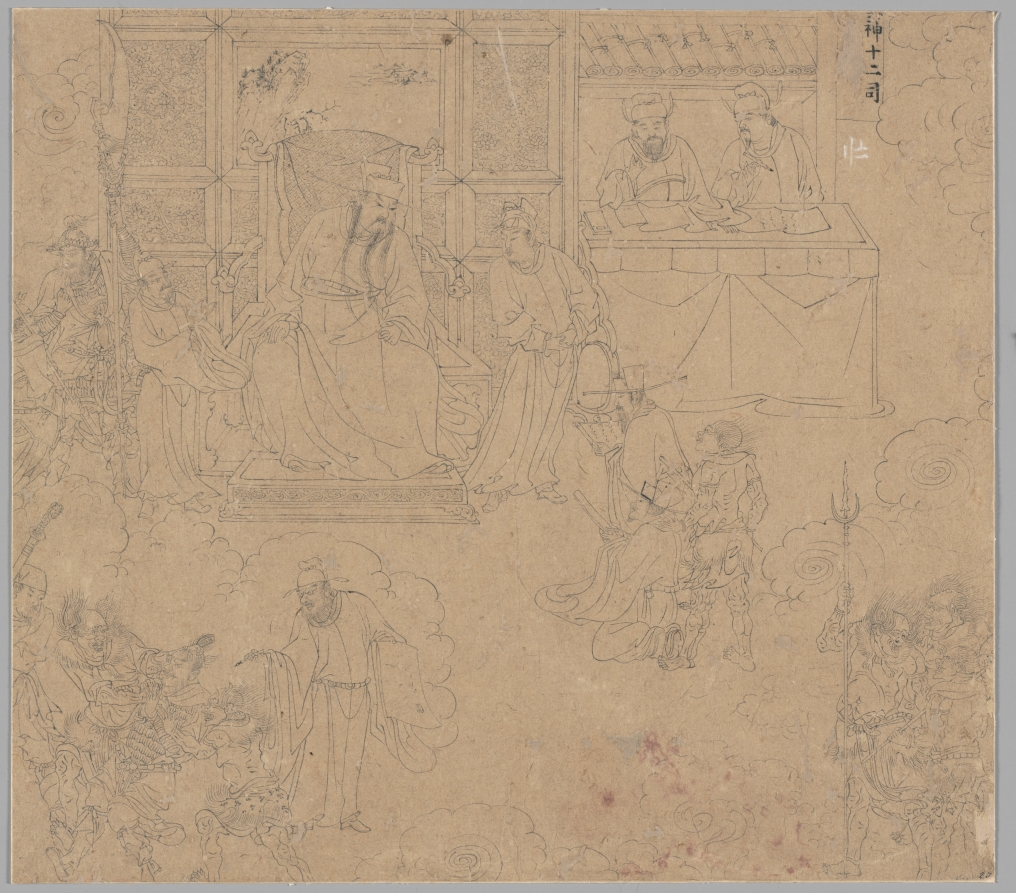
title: Album of Daoist and Buddhist Themes: Kings of Hells: Leaf 27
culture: China, Southern Song dynasty (1127-1279)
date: 1200s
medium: Album, ink on paper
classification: Painting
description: This leaf is part of a set depicting the Ten Kings of Hell. The theme transforms the Indian Buddhist view of judgment after death into a typical Chinese bureaucratic process. Before being permitted to transmigrate into the next life, a soul is tried by 10 different kings in a process that lasts three years. Each king is assisted by scribes and officials who report on the good and bad deeds upon which a verdict is given. In the foreground, demons conduct punishments. The inscription here refers to the 12 functionaries assisting the king.